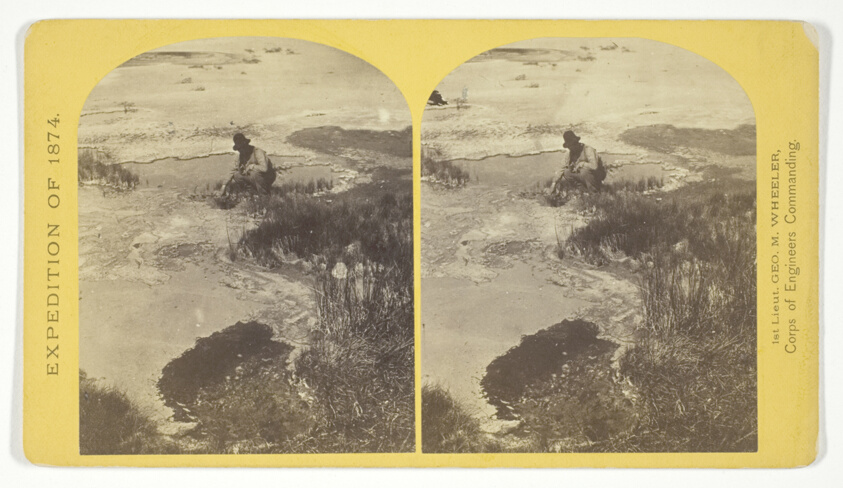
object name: Photograph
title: One of the group of Pagosa Hot Springs, showing incrustation on the surface. Much prized by the Indians and miners on account of supposed healing qualities. Principal mineral element, Sulphate of Soda, No. 38 from the series "Geographical Explorations and Surveys West of the 100th Meridian"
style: 19th century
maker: Timothy O'Sullivan (American, born Ireland, 1840–1882); commissioned by George Wheeler for the War Department, Corps of Engineers, U.S. Army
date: 1874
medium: Albumen print, stereo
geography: United States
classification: stereograph (albumen); photography; photograph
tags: Collected by Hugh Edwards, Geographical Explorations and Surveys